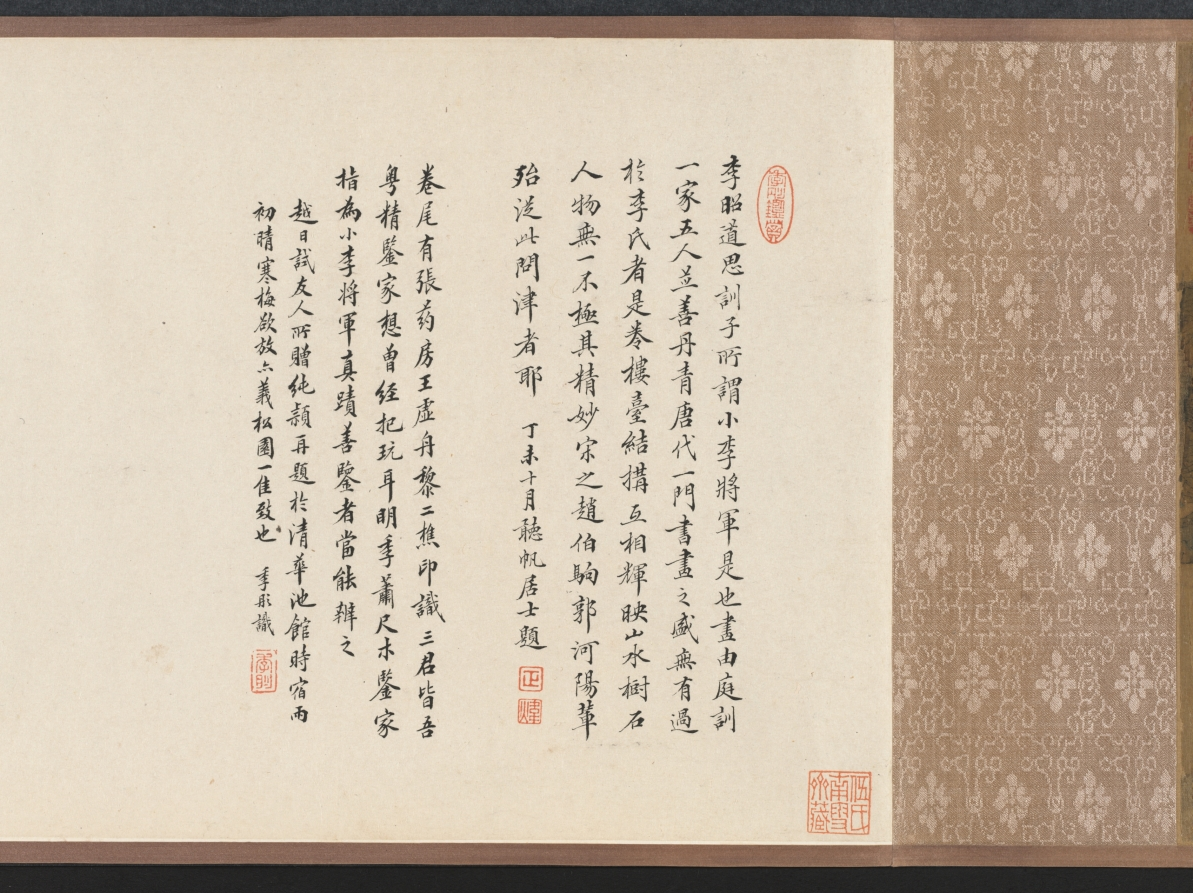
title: Waiting for the Moon in the Mid Autumn Festival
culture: China, Ming dynasty (1368–1644)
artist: Shi Rui (Chinese, c. 1400-c. 1470)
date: 1400s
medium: handscroll, ink, color, and gold on silk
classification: Painting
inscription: [印] 石氏以明; 游戯翰墨.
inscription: 僊山樓觀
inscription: 1 inscription, dated 1639, and 1 seal of Xiao Yuncong 蕭雲従 (1596-1673). Inscription by Xiao Yuncong: This is a painting by the Junior General Li. The painting is damaged and cracked at many places. Many of the paper strips for backing have been missing since long ago, but the colors are still fresh as if they had just been applied and the ink still looks moist. During the reign of Tianbao (742-756) of the Tang Dynasty, the Imperial Klansman Li Sixun was summoned to paint the walls of the Datong Hall. He was known as the "Senior General." His son, who came to be known as the "Junior General," was named Zhaodao. Of the stone epitaph [Li Sixun bei, or the "epitaph of Li Sixun," one of the best known calligraphic monuments of the Tang Dynasty], engraved with the calligraphy of Li Beihai 李北海 [Li Yong 李邕, 678-747], more than half has fallen off. Why, in contrast, was this painting able to survive? Or could it be that despite the fact that the stone is hard and the silk is soft, their preservation or destruction depends on some other factors? Moreover, since they were titled nobility of imperial descent, it is doubtful that they had the leisure and the mood to indulge in such decorative and descriptive blue and gold painting for the mere amusement of their fellow men. Recently, I read the Yi zhou ming hua lu 益州名畫錄 [by Huang Xiufu 黃休復, preface 1005]. I found a certain Li Chin-nu who compared himself with Li Zhaodao 李昭道 and was called by the Sichuan people the Junior General Li. In a painting which he did, entitled Mt. Ch'ing-ch'eng, the architectural structure of the pavilions, terraces, bridges, and boats are meticulous and accurate. The horsemen on a spring outing are as small as grain and the wild geese among the clouds as tiny as dust. It was also said that he painted on silk of any length in accordance to specific commissions. Is it possible that this painting is one of his? Since that time 700 years have passed. Yet one of the two Junior General Li's must be our painter. Formerly, there were the so-called "Four Excellents" in the Hall of Portraits of the Buddhist monk Wu-ta Kuo-shih: the [portrait] painting by Ch'ang Ts'an [act. ca. 881-888}, the calligraphy by Priest Tao-ying, the eulogy by Li Shangyin 李商隱 [813-858], and the landscape by Li Sheng [act. ca. 908-925]. This Li Sheng was styled Chin-nu and was also called Junior General Li. In the tenth month of the Chi-mao year, the twelfth year of the Chongzhen era [1639], recorded by Xiao Yuncong of Wuhu. trans. WKH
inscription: 4 colophons and 30 additional seals: 1 seal of Xu Qianxue 徐乾學 (1631-1694); 1 seal of Li Chien 黎簡 (1747-1799); 1 seal of Chang Chin-fang (18th c.); 2 seals of Sun Erzhun 孫爾準 (1770–1832); 1 colophon and 2 seals of Zhang Weiping 張維屛 (1780-1859); 1 seal of Wu Rongguang 吳榮光 (1773-1843); 1 colophon and 2 seals of Luo Tianchi 羅天池 (1826 jinshi); 7 seals of Wu Yanhui 伍元蕙 (active 1821–1851); 2 colophons and 4 seals of Pan Zhengwei 潘正煒 (1791-1850); 9 seals unidentified.